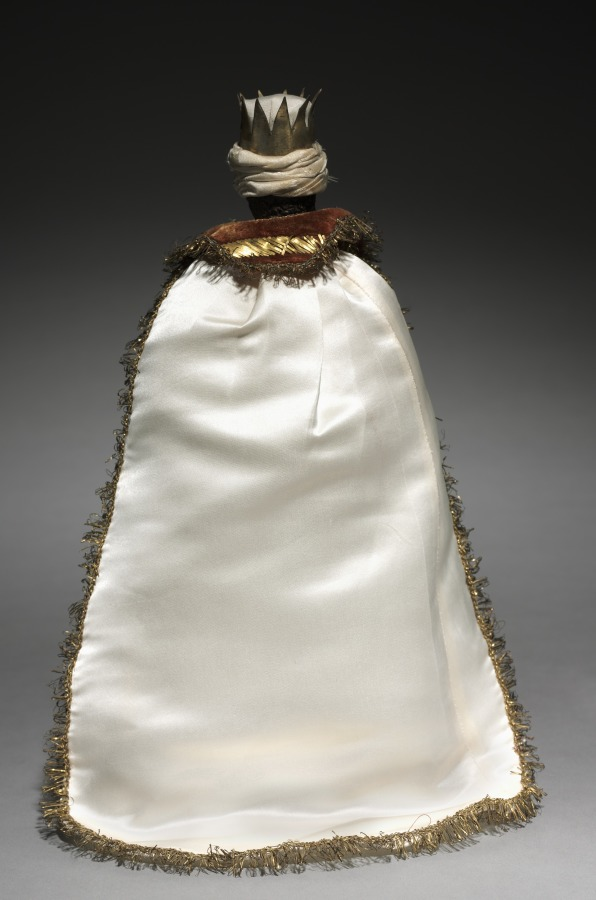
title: Figure from a Crèche: Negro Magus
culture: Italy, Naples, late 18th-early 19th century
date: 1780–1830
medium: painted wood and terracotta with various textiles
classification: Sculpture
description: The practice of creating scenes of the Nativity for the home dates from the early 1700s in Italy, where people began to set up doll-like figures of about a foot or less in height. The custom was particularly popular in Naples around 1800, where crèche scenes (crèche means cradle, or crib) included many figures, whose heads and hands of painted terracotta, stuffed cloth bodies, and clothing adapted from contemporary local costumes gave them an amazingly realistic character. Representations of the birth of Jesus can be traced to the first few centuries of Christianity. Both living creatures and sculptural depictions of them were used from early times. By the late middle ages it was customary to create life-size figures of wood or stone, naturalistically painted, to represent the characters who participated in the events of Jesus's early life. These sculptures were then arranged in scenes illustrating one or both of the most important of these events, the Adoration of the Shepherds and the Adoration of the Magi-the three kings from the East who came to pay homage to the Christ child. Used in churches, these large figures were especially popular in Italy, Central Europe, Spain, and Portugal.